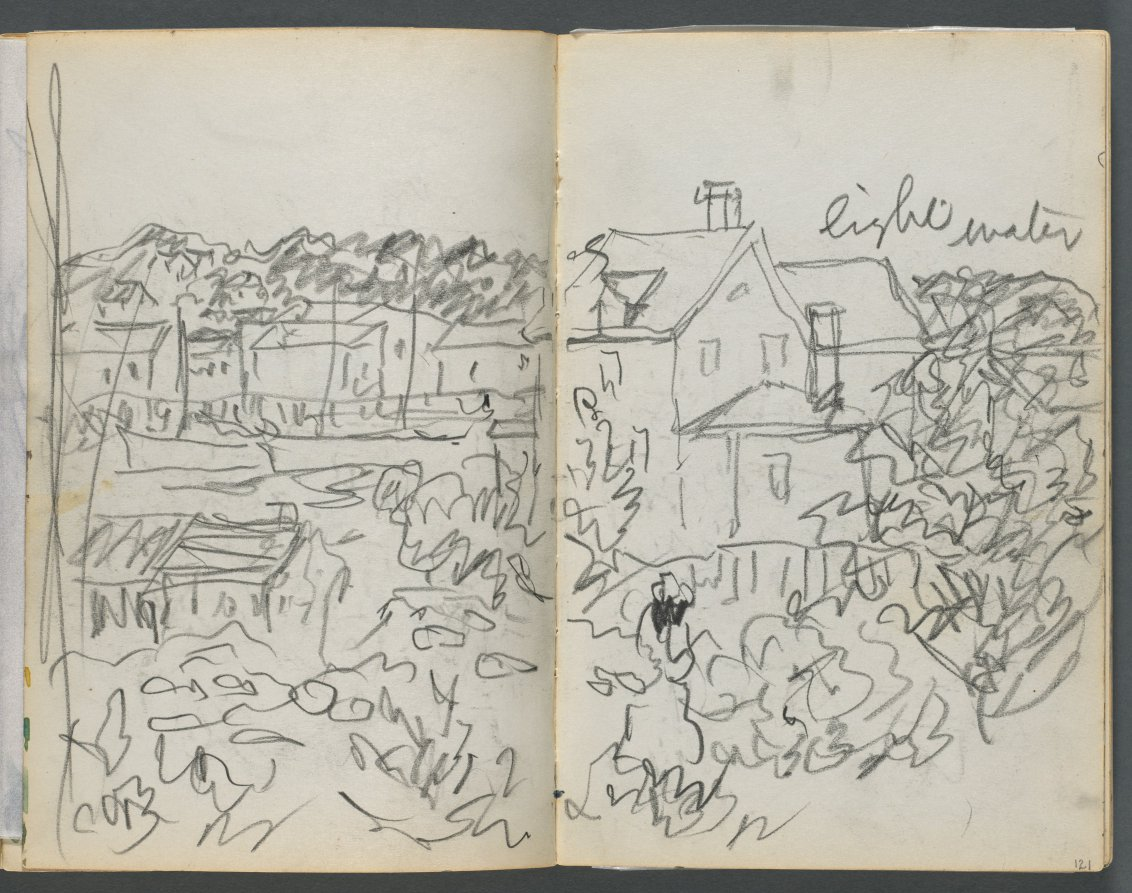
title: Sketchbook, The Dells, N° 127, page 120 & 121: Landscape with Houses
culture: America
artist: Maurice Prendergast (American, born Newfoundland [now Canada], 1858–1924)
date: c. 1919–1921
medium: graphite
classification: Bound Volume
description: This sketchbook contains 59 pages of graphite drawings and 16 watercolors made at various locations on Cape Ann, Massachusetts.